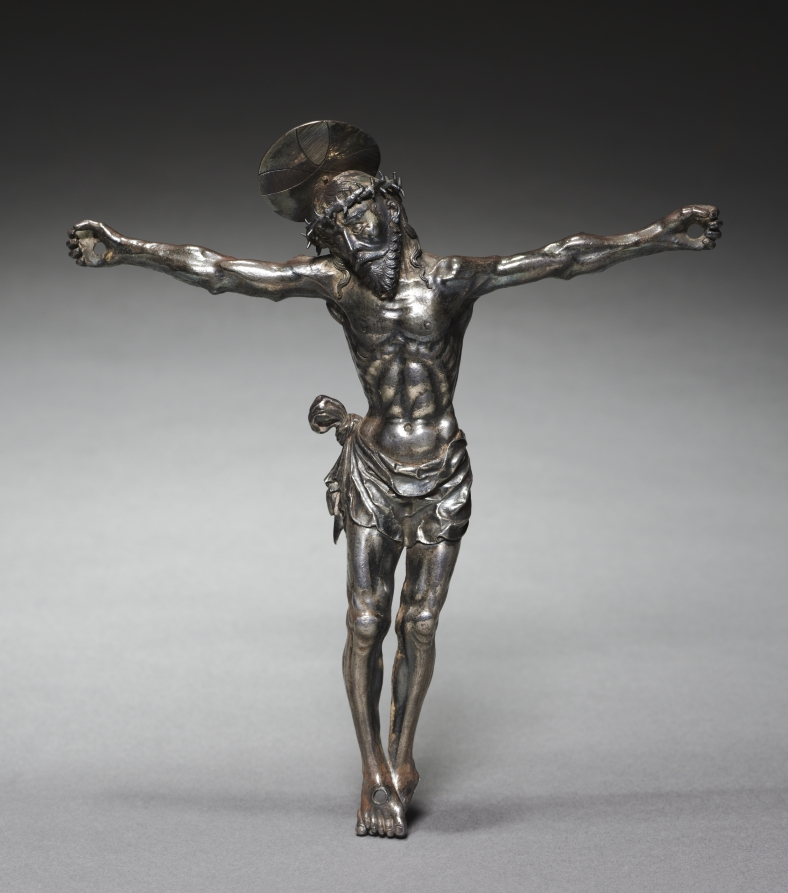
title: Crucifix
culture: Spain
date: 1500s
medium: silver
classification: Sculpture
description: Despite being identified as Spanish since entering the museum's collection, the origin of this crucifix is not so clear. The face and beard could bring to mind Spanish silverwork, but those same features may also suggest that the crucifix is of German design. The back of the figure raises its own set of questions, due to the fact that it has been left hollow and open.